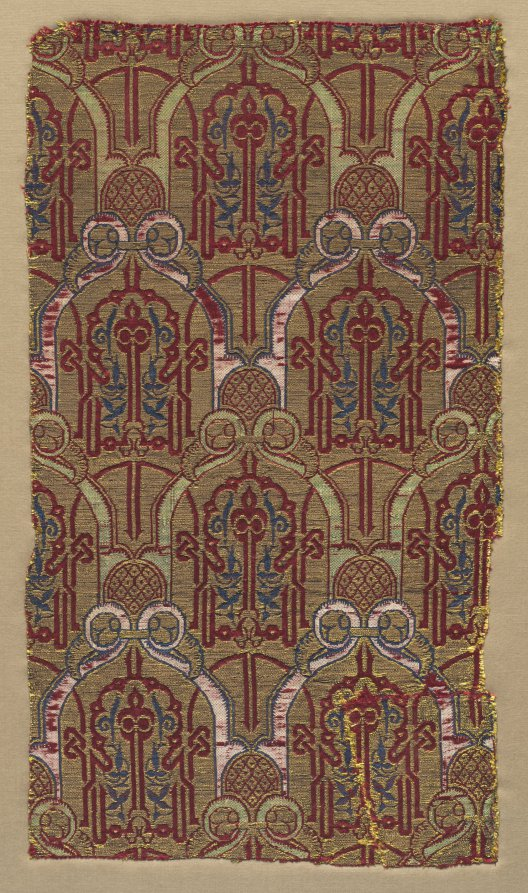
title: Fragment with palmette arches with Alhambra wall pattern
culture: Spain, Granada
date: 1300s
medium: Silk and gilt-metal thread: lampas weave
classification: Textile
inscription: horizontal rows of staggered arch-like forms enclose knotted and interlaced Kufic inscriptions: "Success."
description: This rare, gold-thread silk displays a sophisticated pattern that also decorates the stucco walls of the Alhambra, the imperial palace in Granada. Three superimposed designs form the harmonious pattern on the golden ground. Split-palmette leaves in ivory or green silk form staggered arches displaying a crimson text, Good fortune, written in angular Arabic script with extended strokes that create secondary symmetrical arches. Deep blue palmette leaves create the third level of decoration. The interior walls of the Alhambra would have shimmered with these warm, patterned textiles.